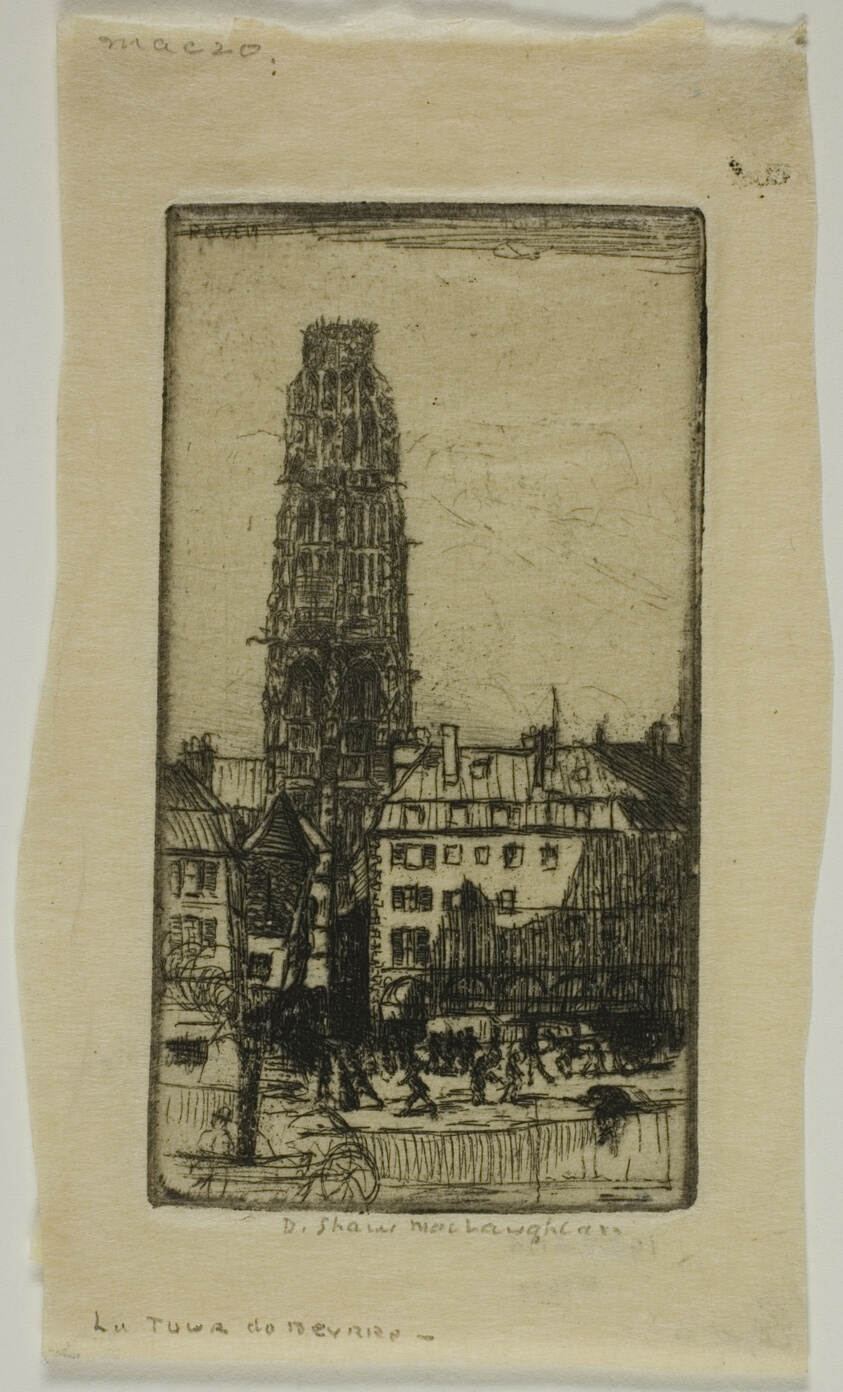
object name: Print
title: Tour de Beurre, Rouen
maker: Donald Shaw MacLaughlan (American, born Canada, 1876-1938)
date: 1899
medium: Etching in black on Japanese paper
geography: United States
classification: etching; print; prints and drawing